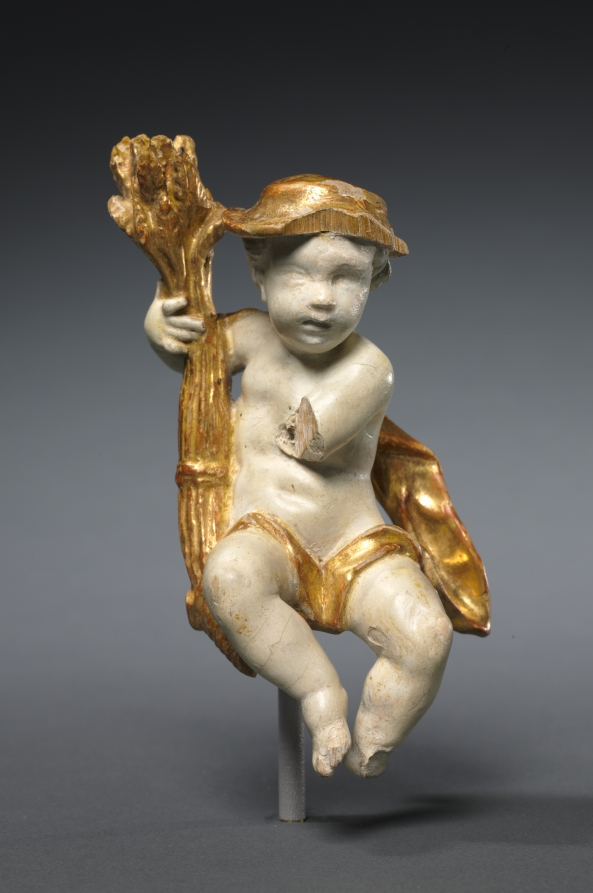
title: Putto as Summer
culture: Germany, 18th century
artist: Ferdinand Tietz (Austrian, 1708–1777)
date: c. 1765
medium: painted and gilded wood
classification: Sculpture